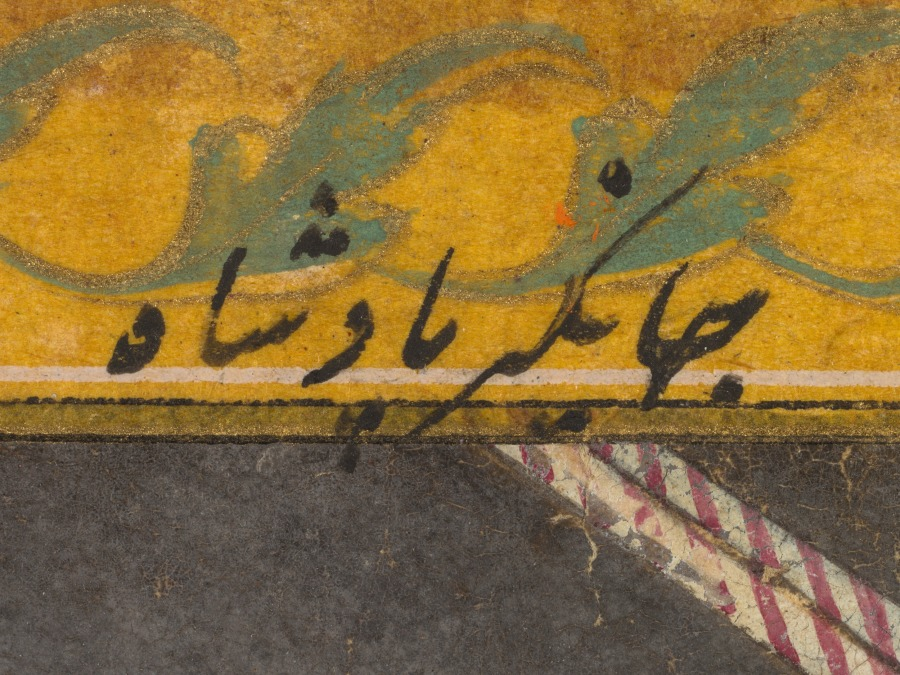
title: Posthumous portrait of Emperor Jahangir under a canopy (recto)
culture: India, Mughal, 17th century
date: c. 1650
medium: Gum tempera, ink, and gold on paper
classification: Painting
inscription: recto: inscription of identification in upper border, partially erased inscription at lower edge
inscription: Persian inscription above, in inner border, in nasta‘liq script: Great King Jahangir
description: Jahangir, the fourth Mughal emperor, was remembered for his greatness long after his death. Ruling from 1605 to 1627, he laid the foundations for long-term trade and diplomatic relations with various nations of Europe, most notably England and Portugal. He oversaw the transition of Mughal India into a global power during a time that can be considered the international Age of Exploration. This posthumous portrait depicts Jahangir amid the trappings of wealth and power with the light of divine sanction shining behind his head. A white marble railing demarcates his imperial space.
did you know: Jahangir holds a ruby or spinel, thought to be a talisman for military victory.